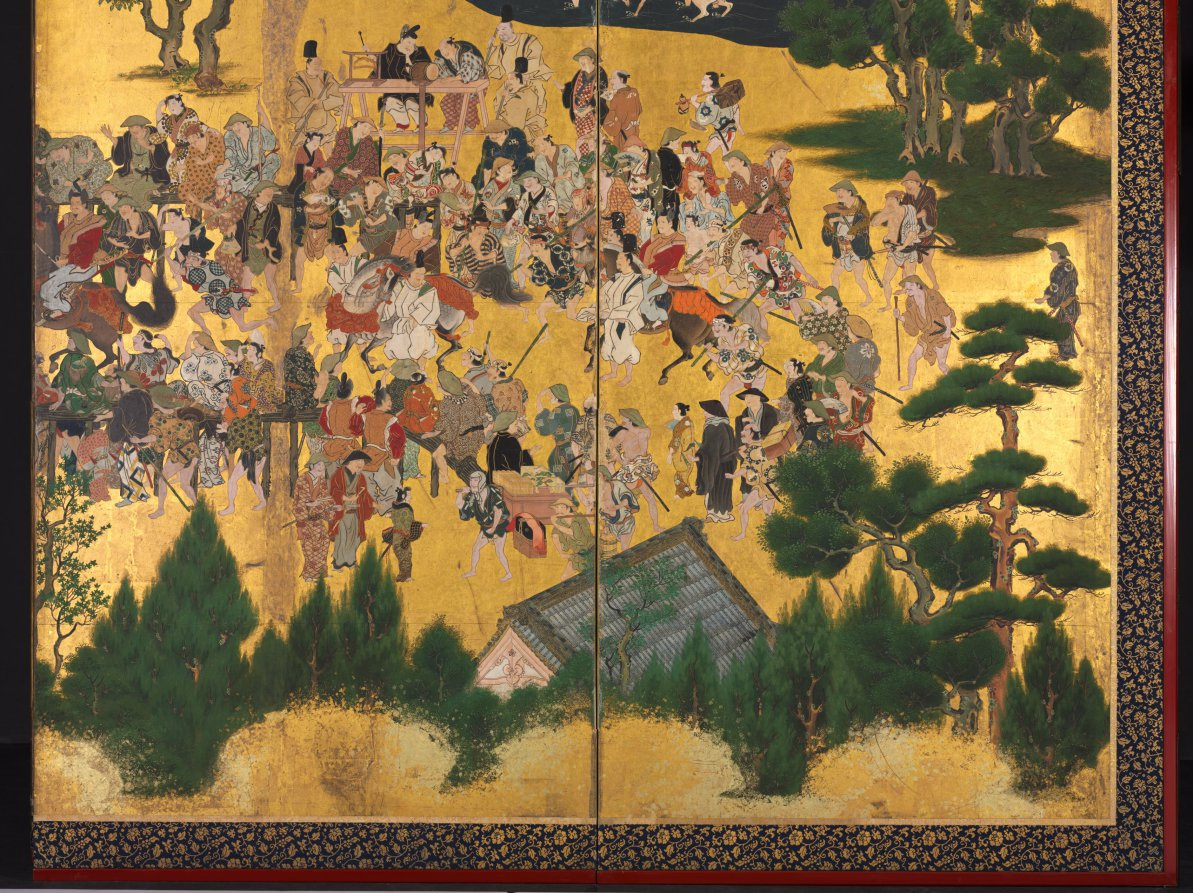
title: Horse Race at the Kamo Shrine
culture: Japan, Edo period (1615–1868)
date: early to mid-1600s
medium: One of a pair of six-panel folding screens; ink and color on gilded paper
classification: Painting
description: Kamo Shrine in Kyoto, seen in the upper half of the left screen, has held an annual horse race on May 5th since the ninth century. Serving as a snapshot of the festivities, this pair of screens captures nearly 600 people watching the race, beginning at the bottom part of the right screen and continuing to the left. The race is a great spectacle where aristocratic riders cling to their fast and unwieldy mounts. While many of those in attendance seem in rapt attention to the main event, other vignettes depict people engaged in an array of activities. This pair of screens was likely originally part of a group of linked murals.